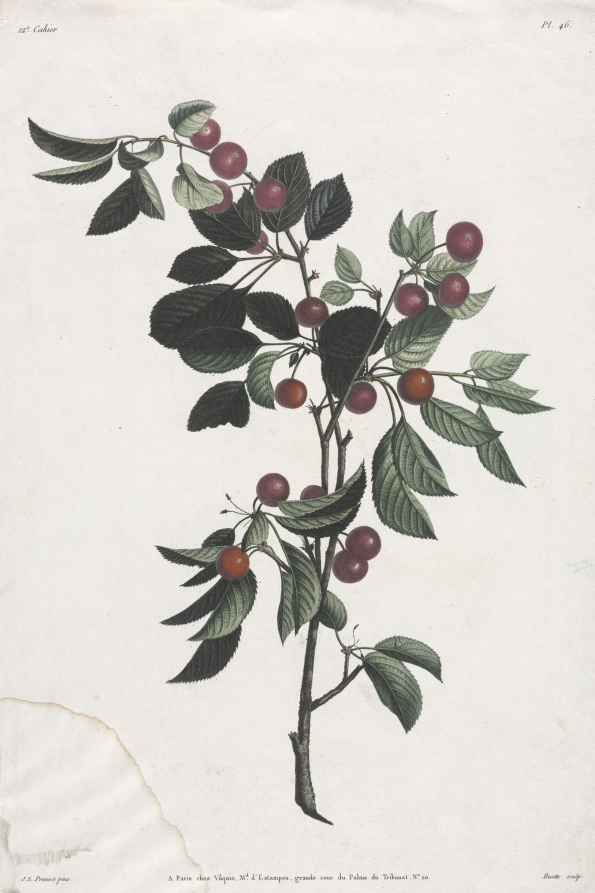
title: Collection des fleurs et des fruits: Branches de Cérises précoce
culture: France, early 19th Century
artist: Jean Louis Prévost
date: 1805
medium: stipple engraving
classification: Print